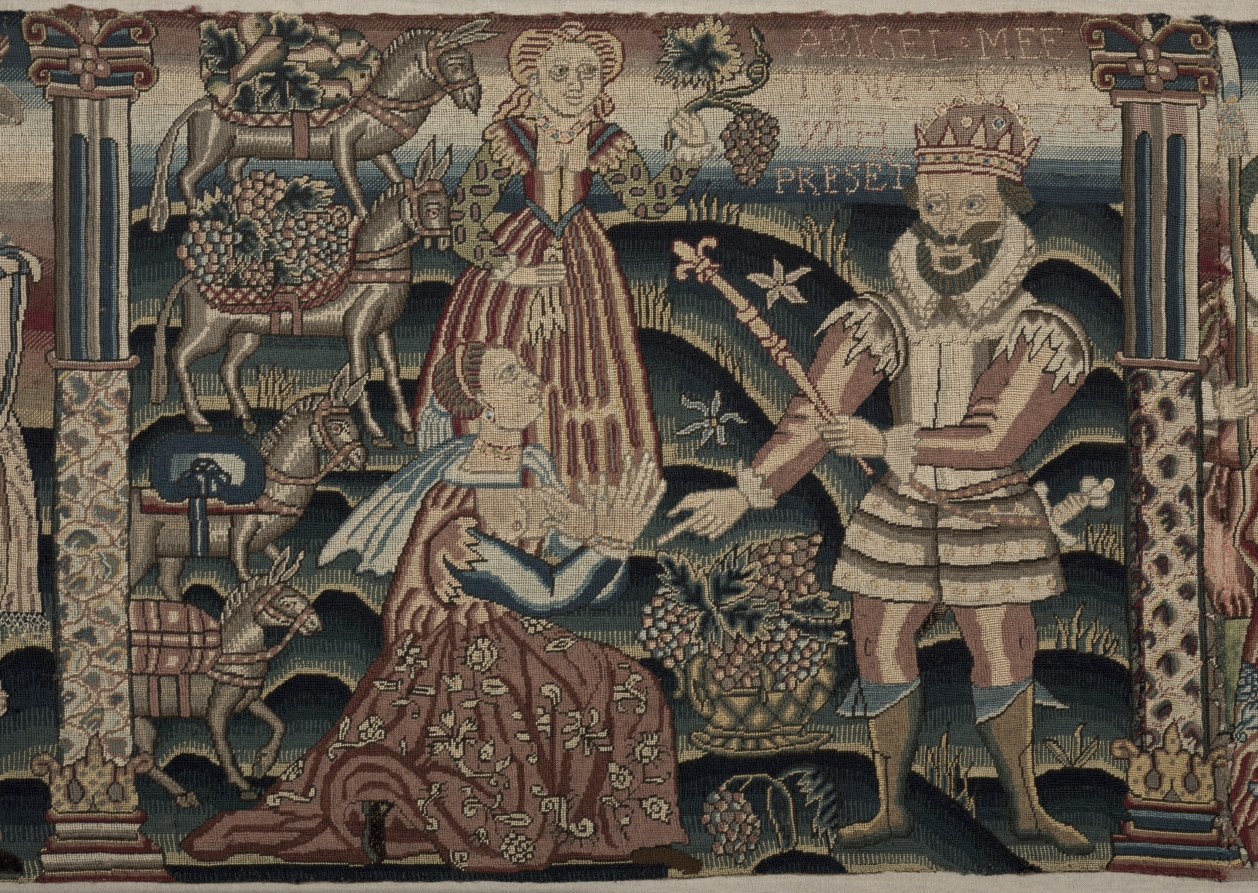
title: Section of an Embroidered Frieze: Rebecca Meeting Isaac, Abigail Meeting David with a Present, The Judgment of Solomon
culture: England, Period of Charles I (1625-1649), 17th century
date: 1625–1649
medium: petit-point embroidery; wool and silk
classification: Embroidery